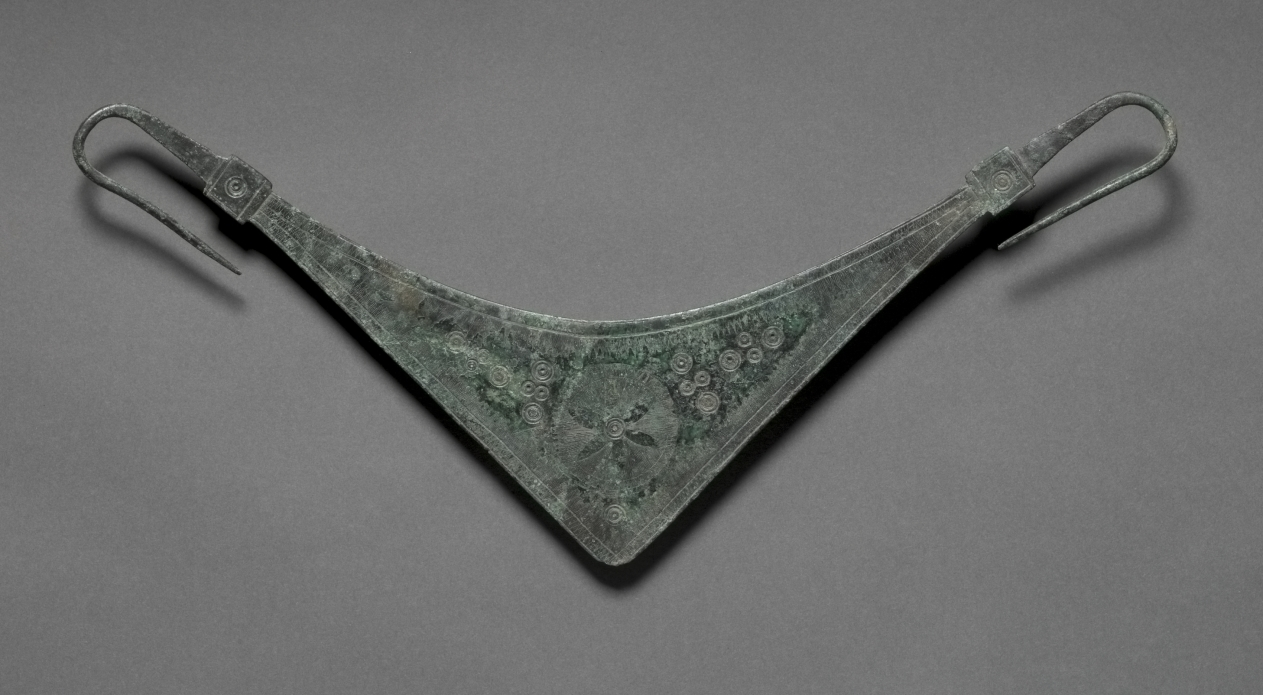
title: Woman's Belt Hanger (Zone)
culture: Greece, Geometric period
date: c. 725–675 BCE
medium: bronze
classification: Metalwork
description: The shape and punched and incised decoration of this northern Greek triangular-shaped zone (woman’s belt hanger) may symbolize a woman’s procreative anatomy, with groups of small circles flanking a large central radiating circle. An ornament of this type was found in a woman’s grave positioned directly over the pelvic bone, and could have been worn suspended from or attached to a belt made of less durable materials.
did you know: Ancient bronze objects often have a greenish hue due to a chemical reaction that creates this surface patina.